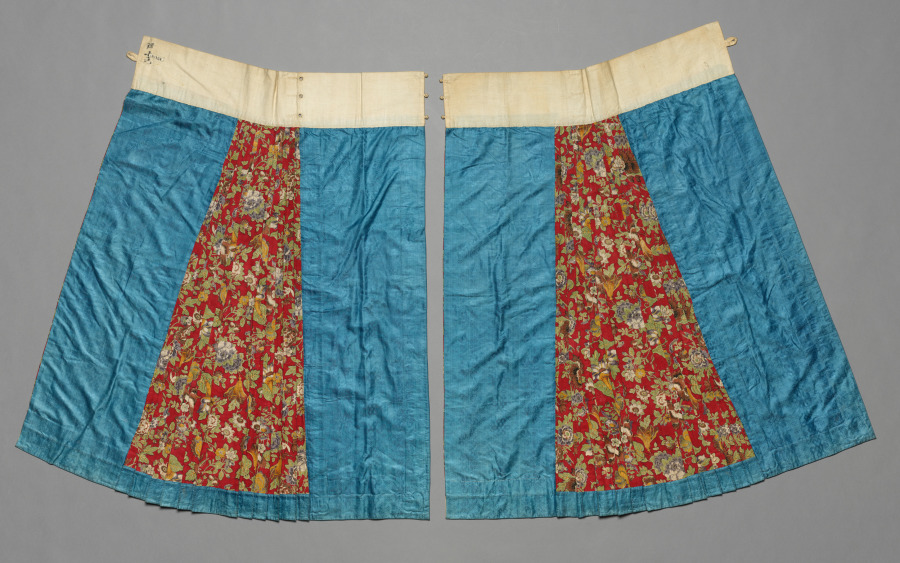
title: Skirt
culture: China, Qing dynasty (1644-1911)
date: 1800s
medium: Silk, cotton: embroidery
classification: Garment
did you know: This skirt includes both embroidered sections and polychrome printed fabric.